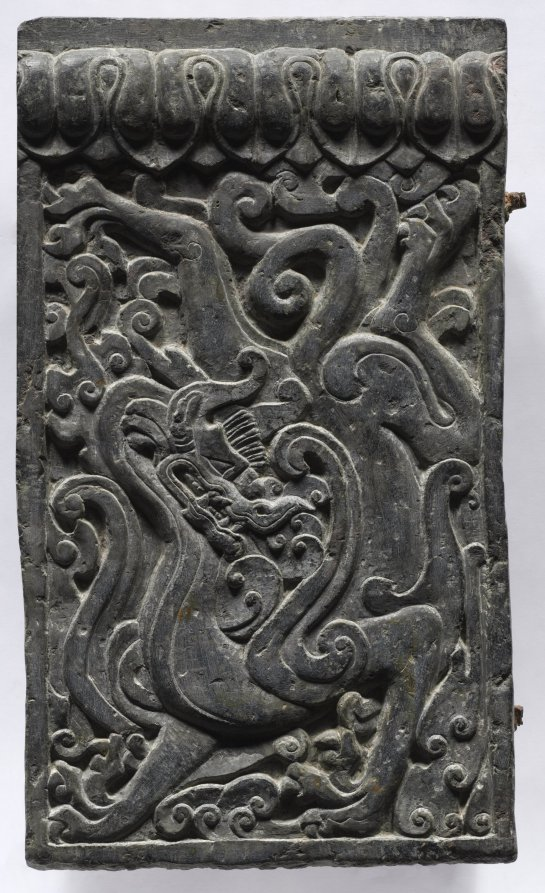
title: Section of a Coffin Platform: Dragon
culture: China, Northern Qi dynasty (550-577)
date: 550–577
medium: limestone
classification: Sculpture